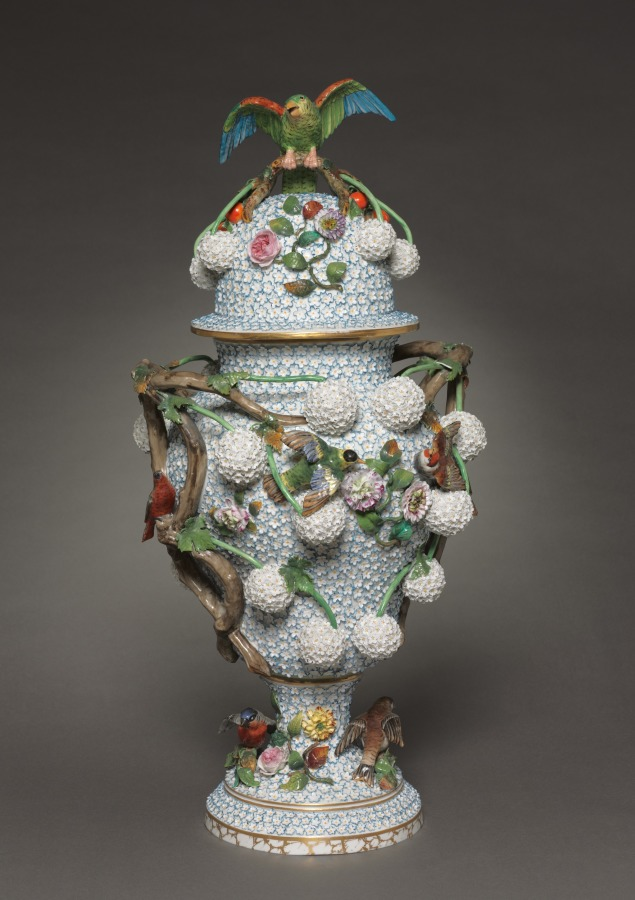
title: Vase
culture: Germany, 19th century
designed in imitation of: Meissen Porcelain Factory (German, est. c. 1710)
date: 1850–1899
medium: porcelain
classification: Ceramic